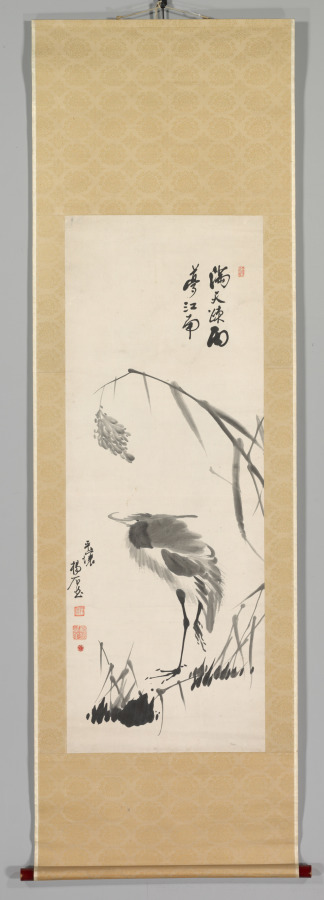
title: Egret and Reeds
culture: Korea, Joseon dynasty (1392–1910)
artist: Yang Ki-hun (Seuk-Eun) (Korean, 1843–1919?)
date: late 1800s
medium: hanging scroll; ink on paper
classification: Painting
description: In this hanging scroll, an egret walks along the shores of a salt marsh where reeds abundantly grow. Native to Pyongyang, the artist Yang Ki-hun had no rival in bird-and-flower themes. The Taedong River estuary, one of Pyongyang’s beloved natural sites, may have been Yang’s favorite spot to observe and sketch various water birds. Yang treated his subjects of flora and fauna with an observant naturalist’s view, yet his choice of subjects—an egret and reeds—is deeply rooted in traditional symbolic language: the egret stands for the scholarly reclusive life, while reeds indicate humility and modesty.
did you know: Yang Ki-hun was one of the most commercially successful painters known for decorative bird-and-flower subjects.